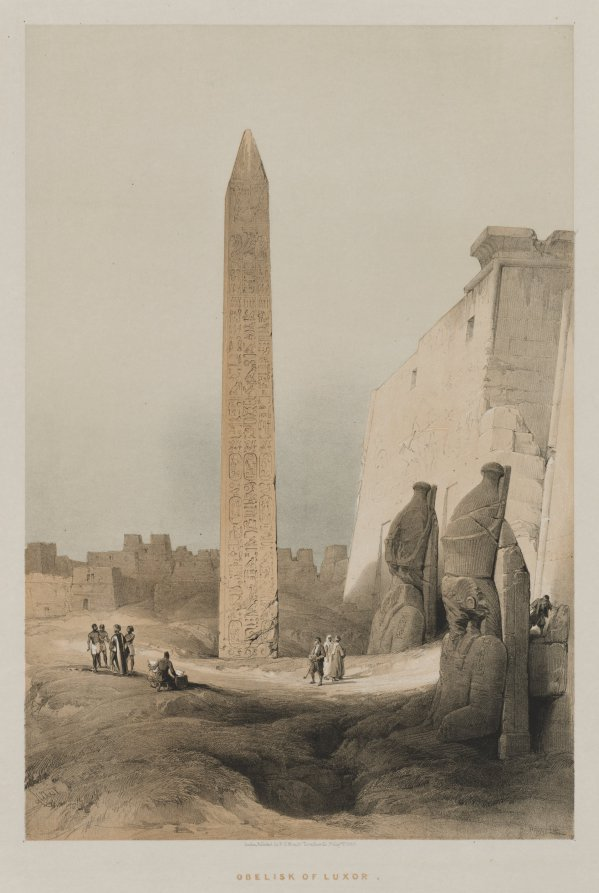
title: Egypt and Nubia, Volume I: Luxor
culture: England, 19th century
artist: Louis Haghe (British, 1806–1885)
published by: F. G. Moon, 20 Threadneedle Street, London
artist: after David Roberts (Scottish, 1796–1864)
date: 1846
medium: color lithograph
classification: Print